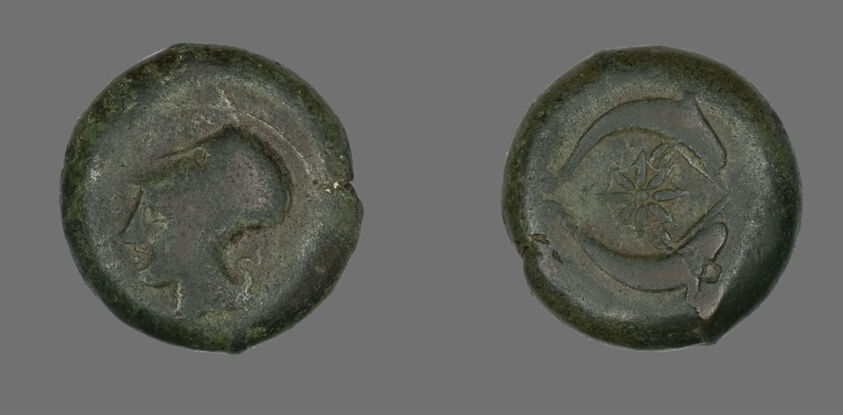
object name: Coin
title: Coin Depicting the Goddess Athena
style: greek, ancient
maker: Greek; minted in Syracuse, Sicily, Italy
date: 345-317 BCE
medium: Bronze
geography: Syracuse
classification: coin; ancient art